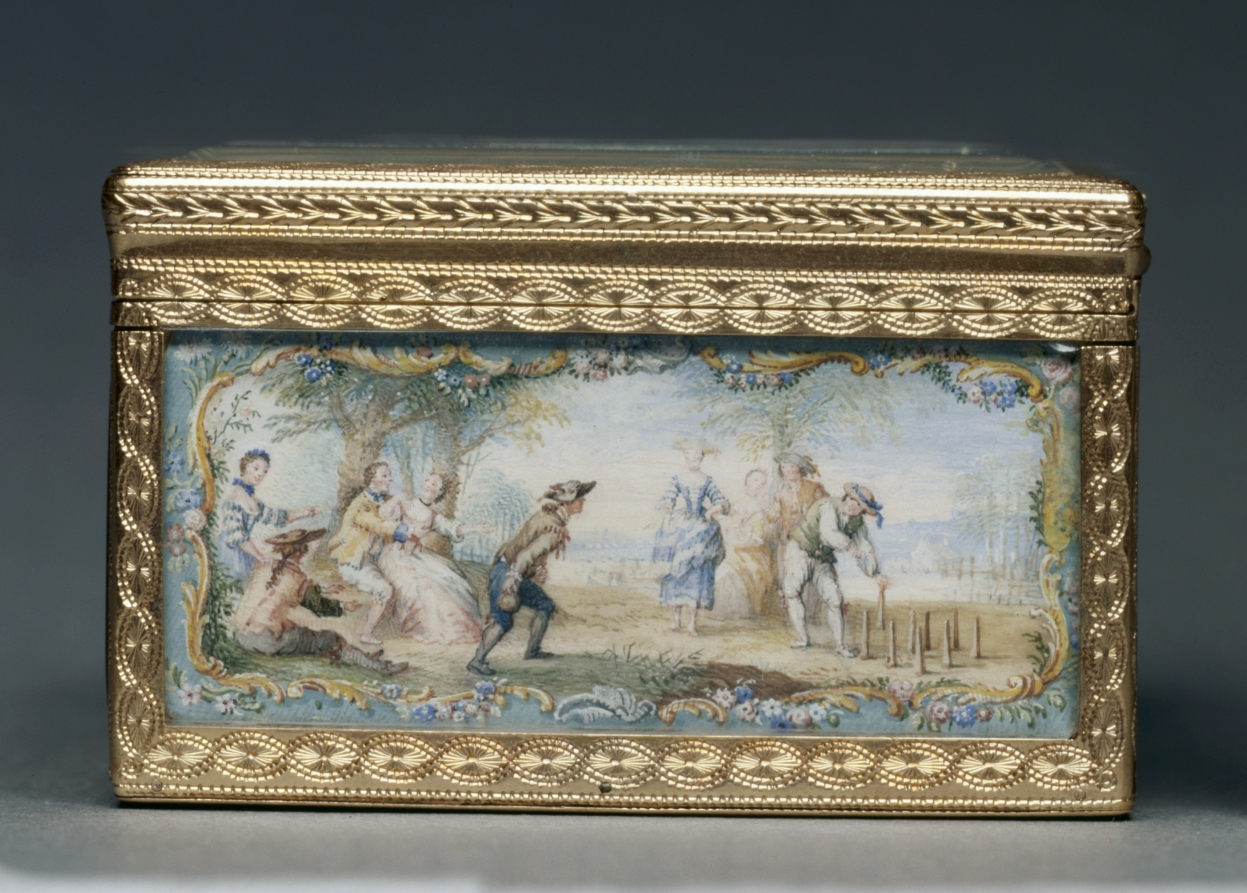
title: Snuff Box (Tabatière)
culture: France, 18th century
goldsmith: Jean Ducrollay (French, 1709–1787)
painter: Louis Nicolas van Blarenberghe (French, 1716–1794)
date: 1753–54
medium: gold and glass with miniatures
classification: Metalwork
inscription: [Maker's mark of Jean Ducrollay, master goldsmith in 1734, inside cover; bottom; right side]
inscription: [Charge mark of Julien Berthe, Paris, 1750-1756, inside cover; bottom; right side]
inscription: [Discharge mark of Julien Berthe, Paris, 1750-1756, on bezel]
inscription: [Inscribed on miniature, front side]: "V.[an] Blarenberghe/1753"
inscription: [Warden's mark for Paris, 1763-1754, inside cover; bottom; right side]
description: In 18th-century France ornately enameled boxes that held snuff—powdered tobacco—became a popular accessory in the French court. This object’s rectangular shape differs from early work attributed to Jean Ducrollay. Though the light colors, floral borders, and depictions of lively outdoor recreation are representative of earlier rococo imagery, the rectangular shape and simple frieze make it a primary example of rising neoclassicism.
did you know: The Ducrollay family was one of the most sought-after Parisian goldsmith workshops under the reign of French King Louis XV.